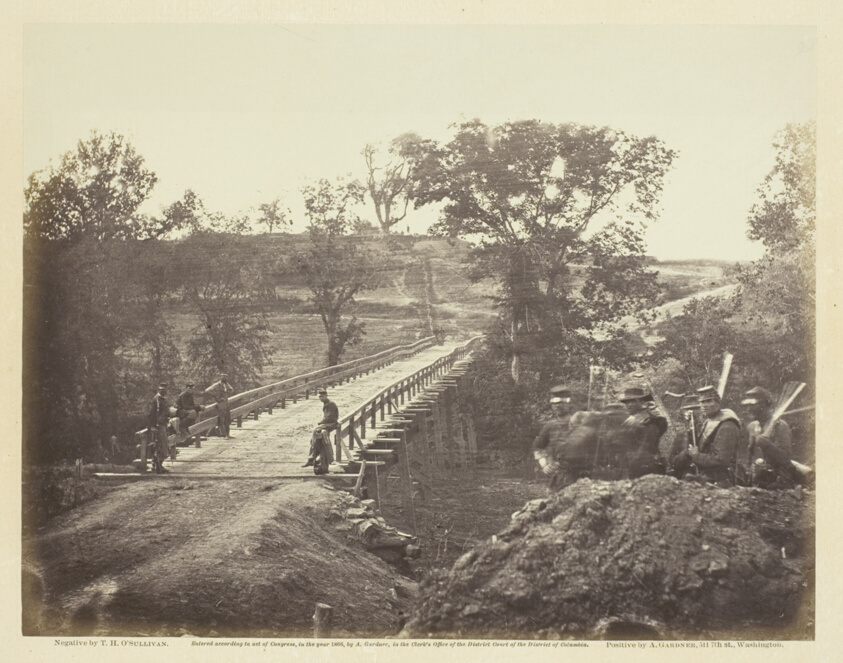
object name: Photograph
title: Chesterfield Bridge, North Anna, Virginia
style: 19th century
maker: Timothy O'Sullivan (American, born Ireland, 1840–1882)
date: May 1864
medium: Albumen print, pl. 66 from the album "Gardner's Photographic Sketch Book of the War, Volume II" (1866)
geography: United States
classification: photograph; albumen silver print; photography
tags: Collected by Hugh Edwards, Gardner's Photographic Sketch Book